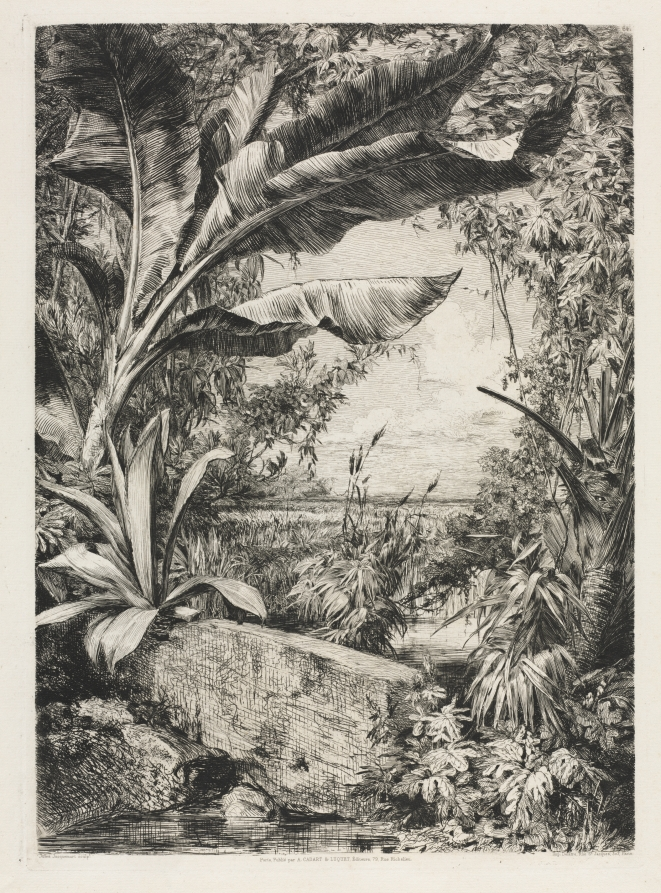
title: Plants of the Greenhouse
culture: France, 19th century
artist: Jules Jacquemart (French, 1837–1880)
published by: A. Cadart & Luquet, 79, rue Richelieu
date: 1872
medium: etching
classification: Print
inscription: in plate, lower right: "J. Jacquemart"